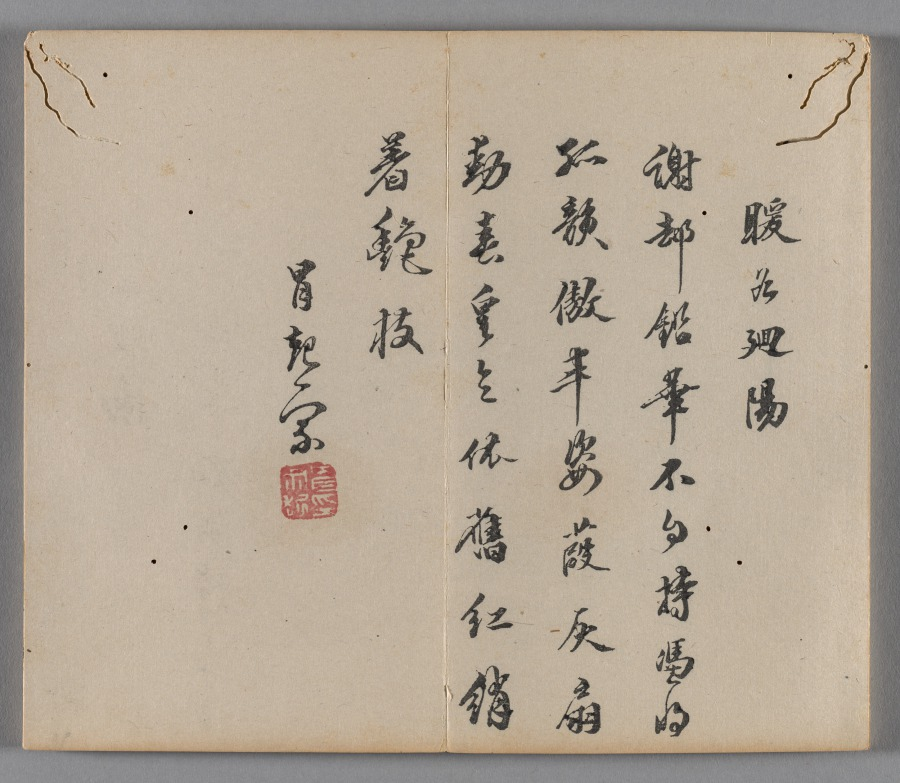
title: Ten Bamboo Studio Painting and Calligraphy Handbook (Shizhuzhai shuhua pu): Plum Blossoms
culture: China, Qing dynasty (1644-1911)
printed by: Hu Zhengyan (Chinese, c. 1584–1674)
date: 1633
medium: Woodblock-printed book; ink and colors on paper; first edition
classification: Print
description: Color printing reached a level of perfection in the early 1600s, as seen in this Ten Bamboo Studio Collection of Calligraphy and Painting and the Mustard Seed Garden Manual of Painting (printed 1679 and 1701). The painterly quality, precision in registering (aligning) the woodblocks, and harmonious colors made them the most successful color print editions in Chinese history. Both editions were printed and compiled in Nanjing, spread nationwide, and had a great impact on the arts in Japan and Korea.